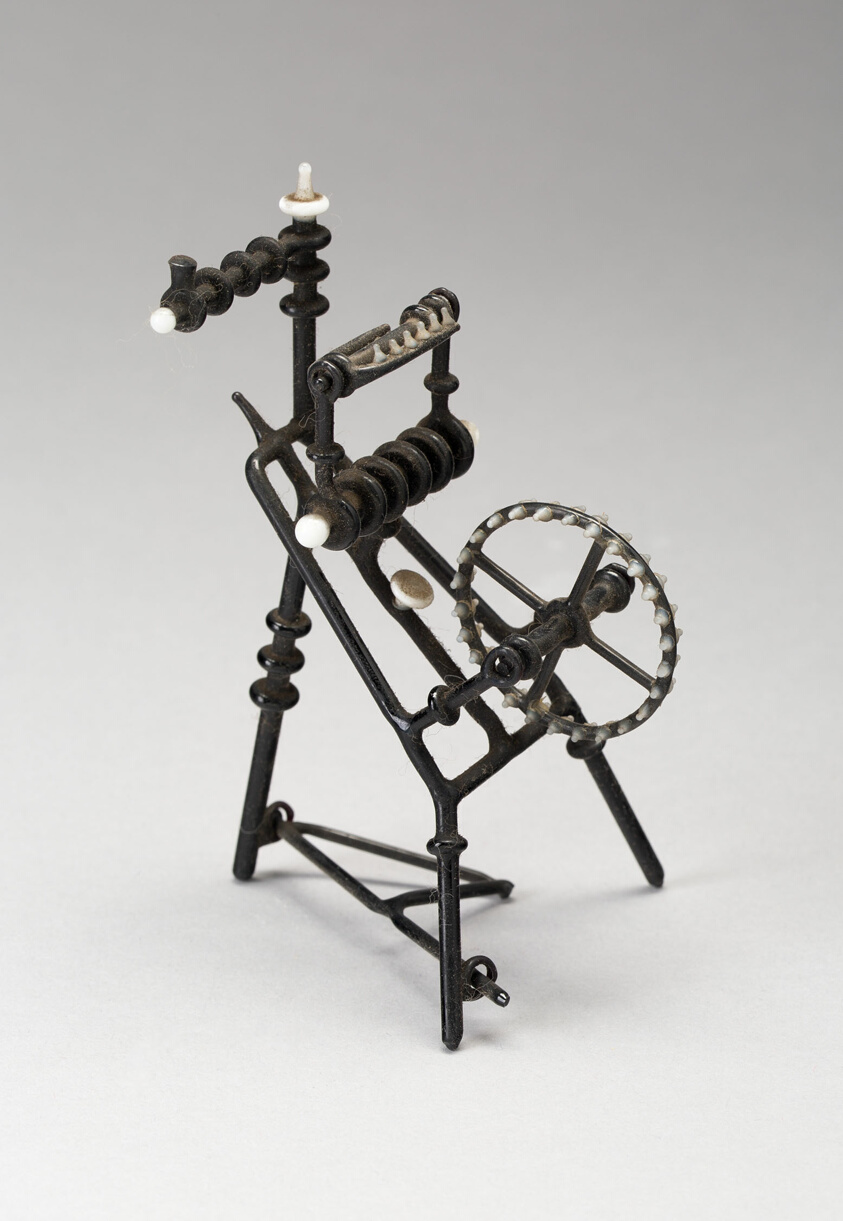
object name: Glass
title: Spinning Wheel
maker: Nevers, France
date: 18th century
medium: Glass; lampwork (verre de Nevers), metal armature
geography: France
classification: decorative object/ornament; lampwork; glass; european decorative arts